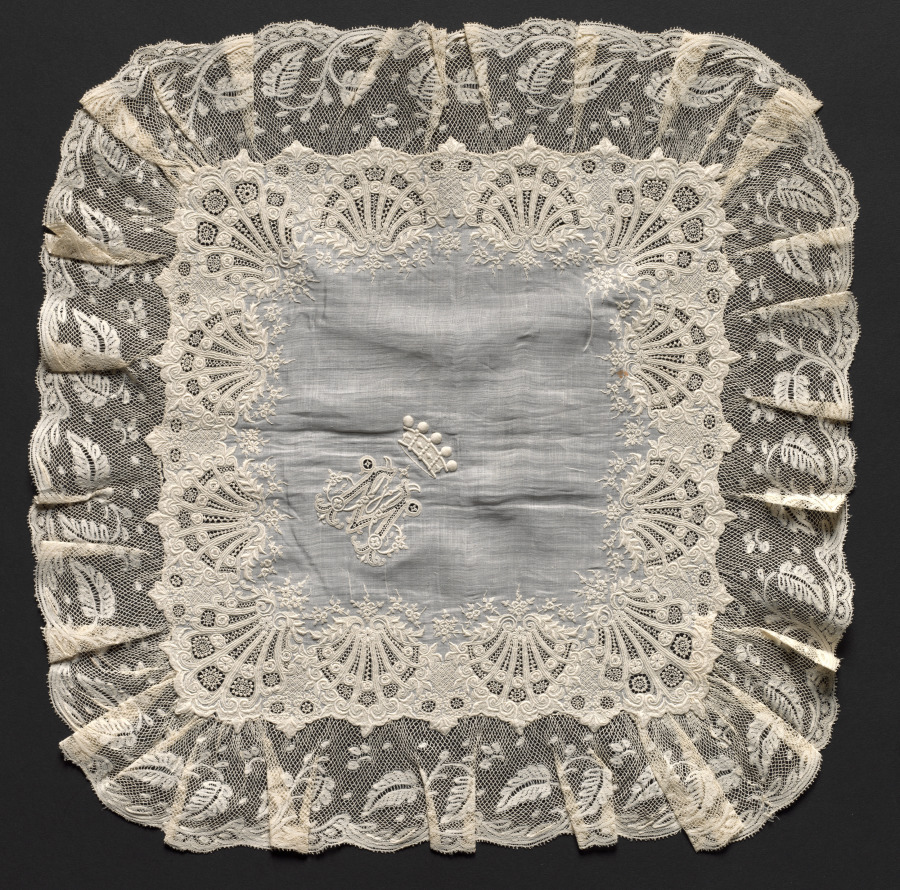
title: Lace Handkerchief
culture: Switzerland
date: 1780–99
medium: Plain weave linen center; bobbin lace (Valenciennes) and embroidered edging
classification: Embroidery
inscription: in one corner, "M.M." with coronet above.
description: In one corner, this handkerchief has a monogram with the initials M. M. There is a coronet above the initials.